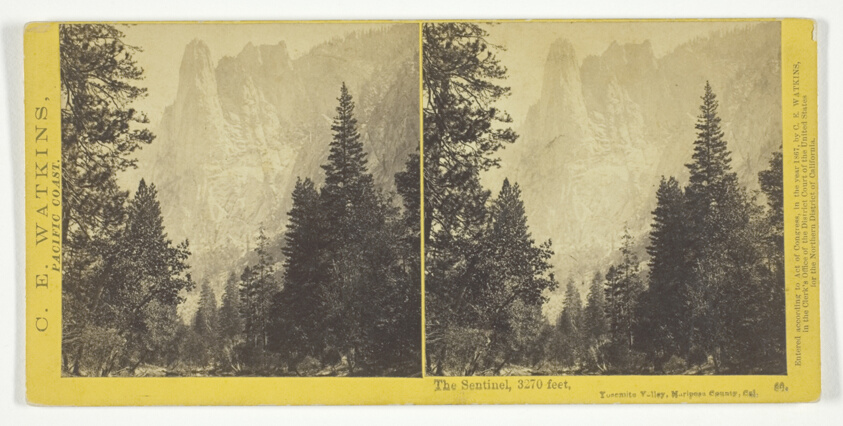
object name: Photograph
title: The Sentinel, 3270 feet, Yosemite Valley, Mariposa County, Cal., from the series "Watkins' Pacific Coast"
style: 19th century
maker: Carleton E. Watkins; American, 1829-1916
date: 1867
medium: Albumen print, stereo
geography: United States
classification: stereograph (albumen); albumen silver print; photographic process; photography; photograph